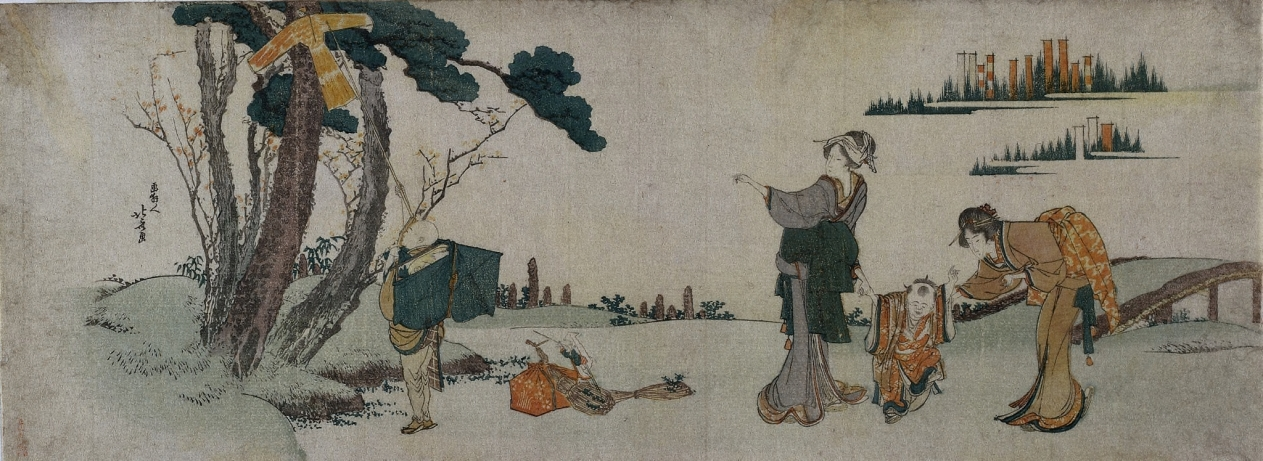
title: Women Distracting a Child whose Kite is caught in a Tree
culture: Japan, Edo period (1615–1868)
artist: Katsushika Hokusai (Japanese, 1760–1849)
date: c. 1800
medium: color woodblock print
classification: Print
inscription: Signature: Gakyokin Hokusai ga